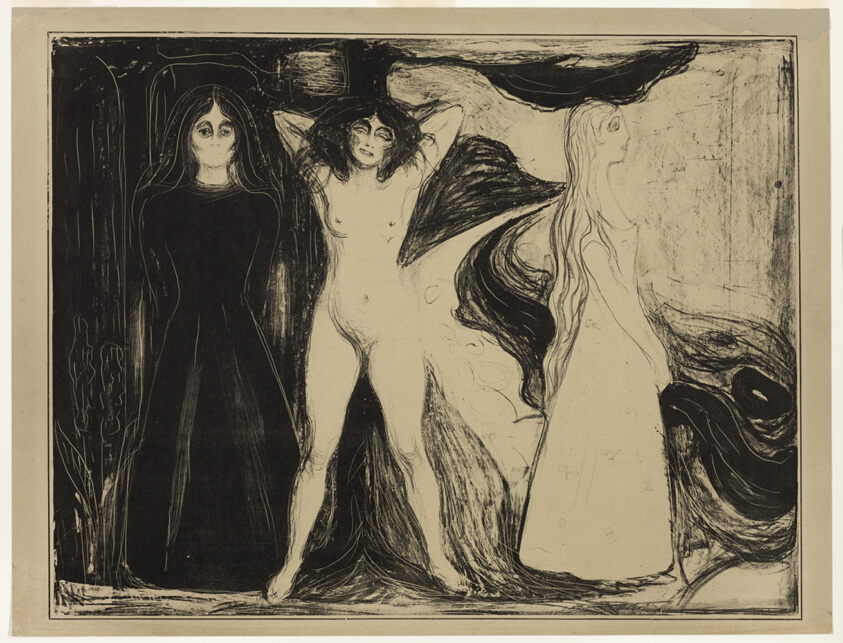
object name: Print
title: Woman (The Sphinx)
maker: Edvard Munch (Norwegian, 1863-1944); printed by Petersen and Waitz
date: 1899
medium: Lithograph on paper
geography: Norway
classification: lithograph; print; prints and drawing